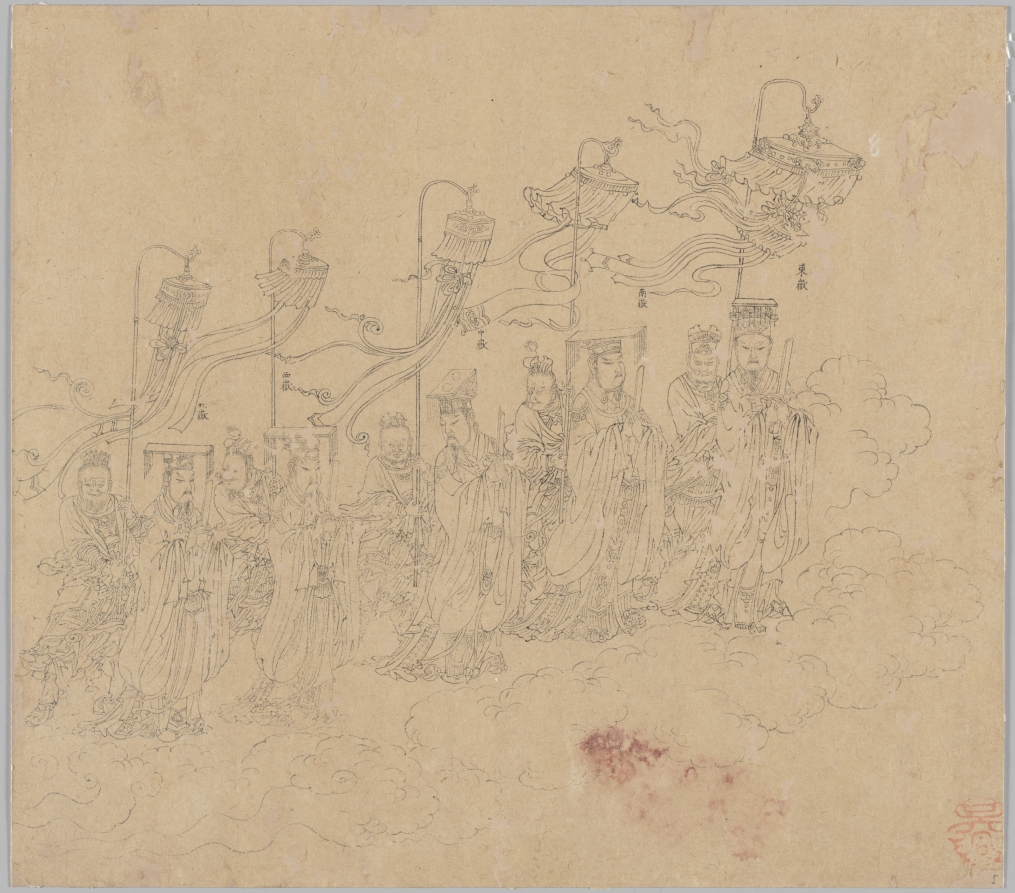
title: Album of Daoist and Buddhist Themes: Procession of Daoist Deities: Leaf 5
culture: China, Southern Song dynasty (1127-1279)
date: 1200s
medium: Album, ink on paper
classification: Painting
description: This extraordinary album has 50 paintings on a variety of religious subjects. They were likely created by several master craftsmen to share with studio apprentices as models for fulfilling commissions. The Jade Emperor and the Daoist pantheon make up the first 26 leaves. The next 14 leaves portray the Buddhist Ten Kings of Hell administering punishments to the dead. The third section, called “Clearing the Mountains,” features divine soldiers, led presumably by the deity Erlang Shen 二郎神, fighting undesirable creatures.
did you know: These five deities preside over the Five Sacred Mountains.